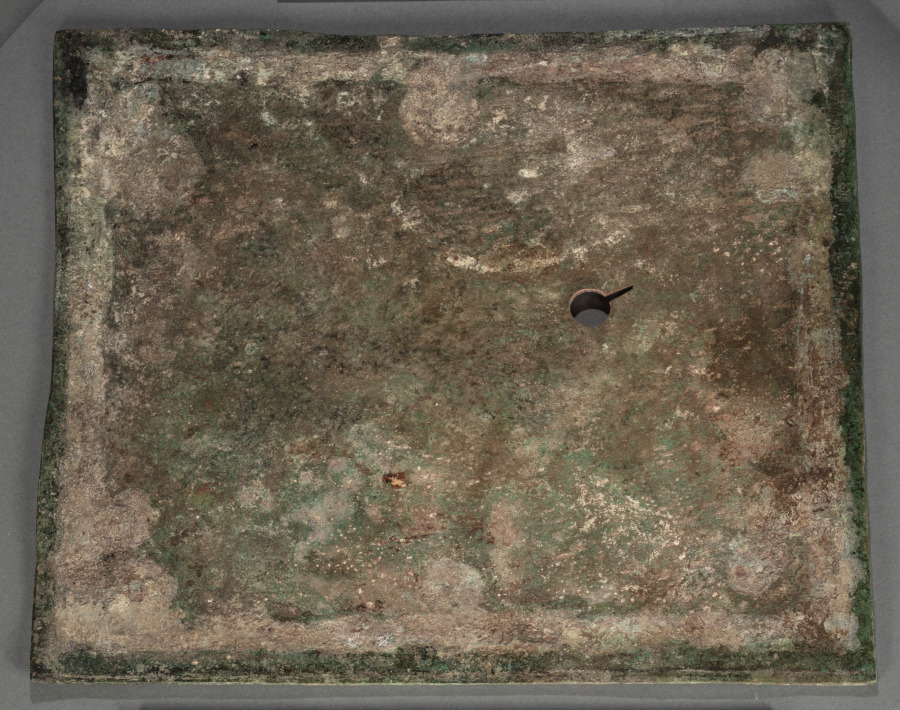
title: Baseplate for the Cleveland Apollo: Apollo Sauroktonos (Lizard-Slayer) or Apollo the Python-Slayer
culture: Greece, Athens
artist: possibly by Praxiteles (Greek, Athenian, c. 400–330 BCE)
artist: or Follower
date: c. 350–200 BCE, or possibly later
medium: bronze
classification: Sculpture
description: The baseplate is nearly square in shape, but two edges are noticeably concave. A modern hole facilitates mounting (with a modern rod in the right leg), and marks show the placement of both feet, once attached with lead solder. A nearly circular lead solder mark located at the front left corner likely corresponds to the placement of a small tree, now lost.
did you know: Most large-scale ancient bronze sculptures stood on bases made of stone rather than bronze.